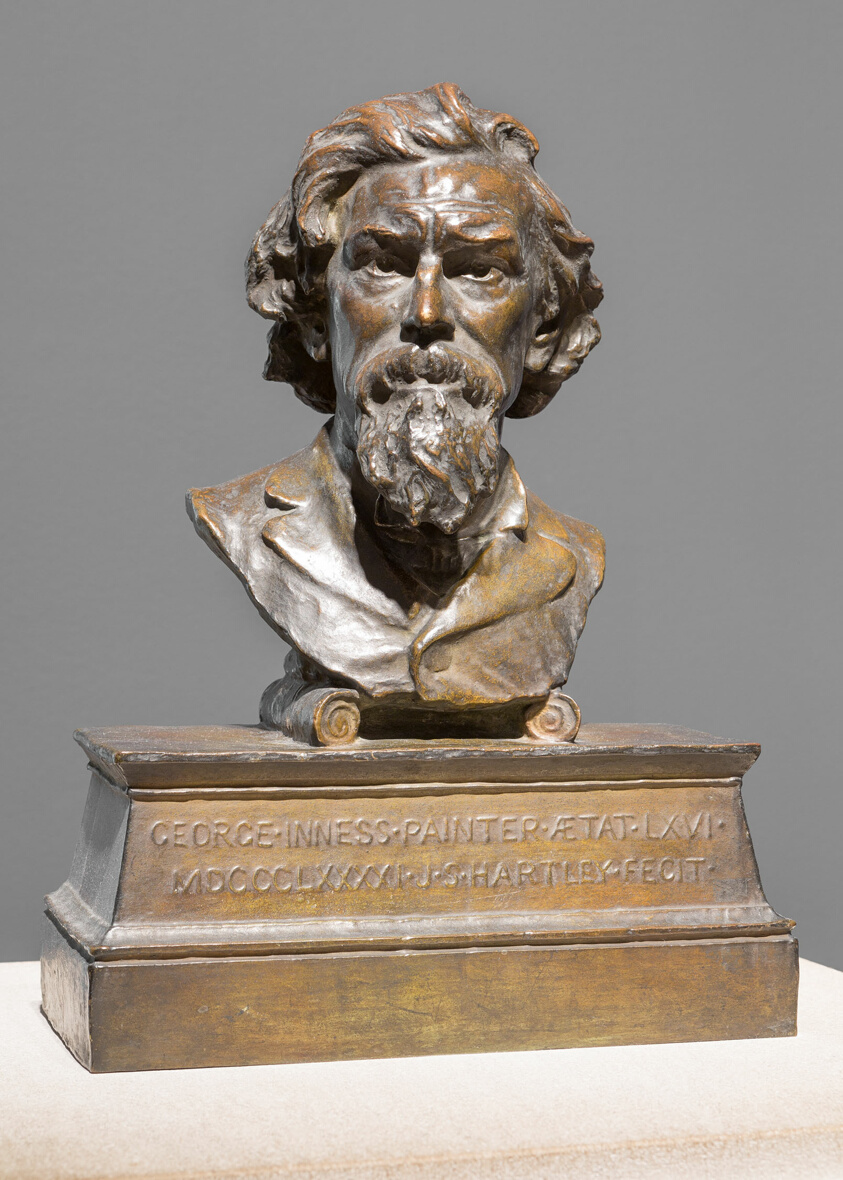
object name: Sculpture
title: George Inness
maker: Jonathan Scott Hartley (American, 1845–1912); Cast by Roman Bronze Works (American, founded 1897)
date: 1891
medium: Bronze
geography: New York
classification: sculpture; american arts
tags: people, portraits